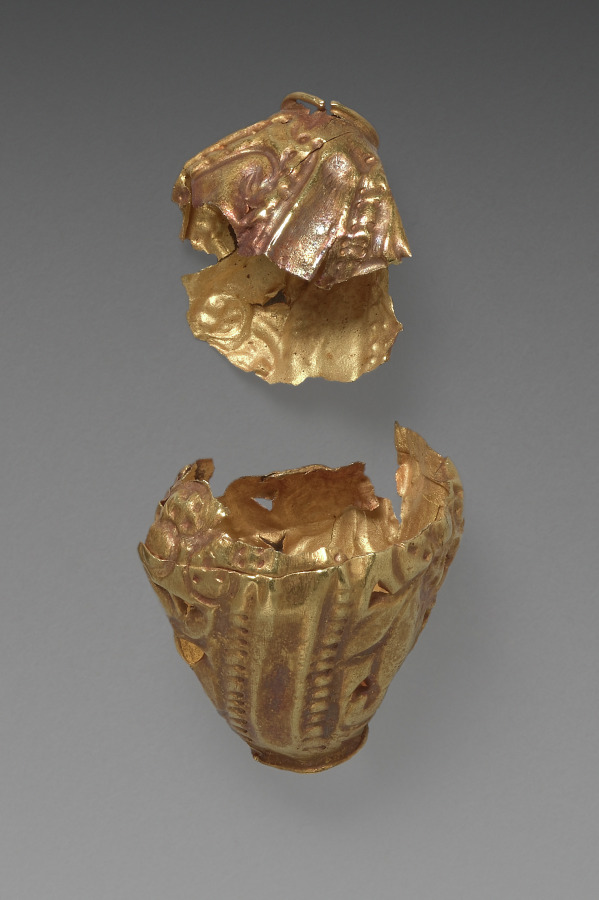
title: Bead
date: after 1519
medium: gold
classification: Jewelry